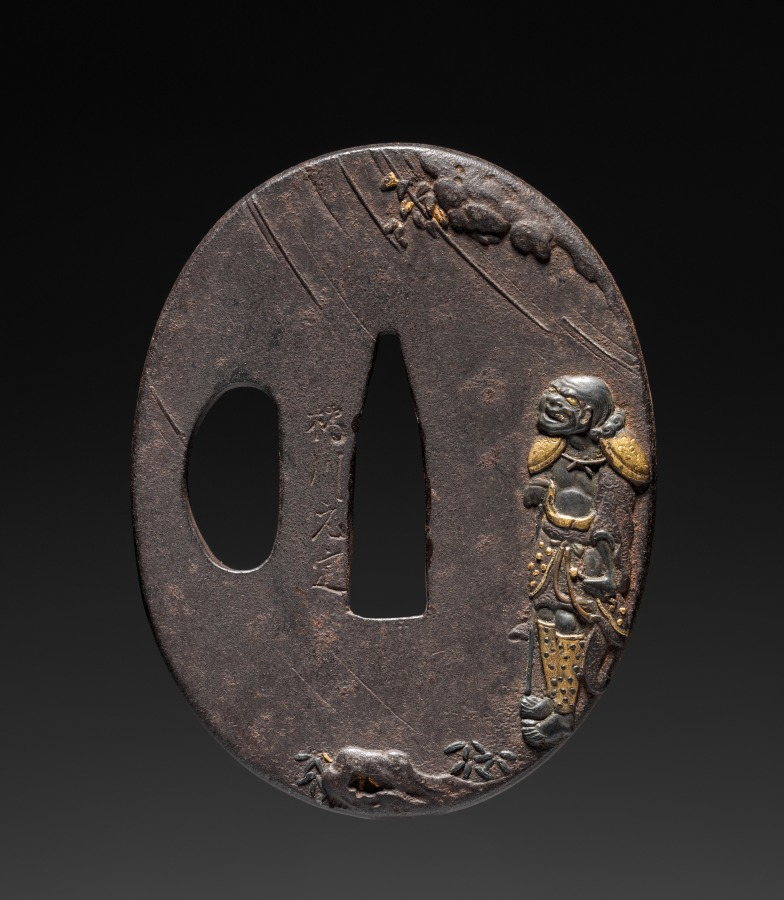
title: Sword Guard (Tsuba)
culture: Japan, possibly Edo period (1615-1868)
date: c. 1615–1868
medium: iron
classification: Arms and Armor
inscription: signed: 橘川之定